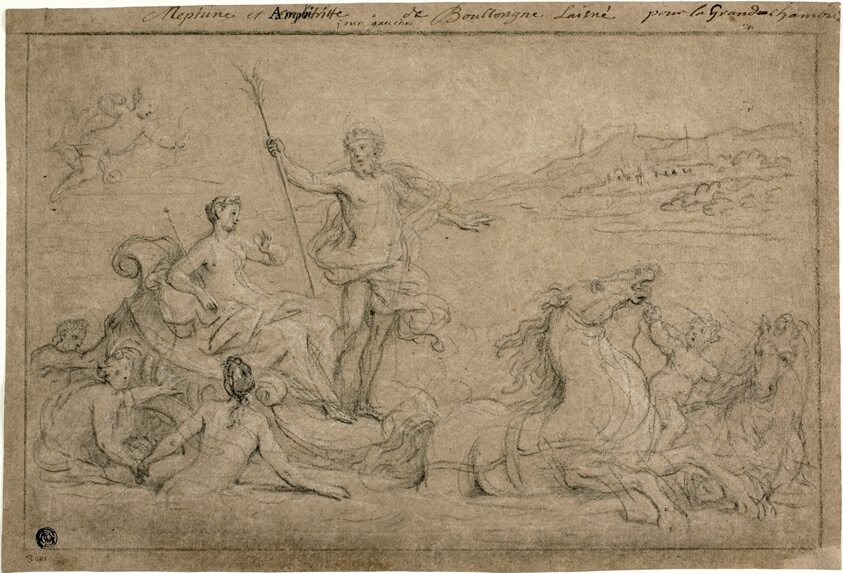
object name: Drawing and Watercolor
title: Triumph of Neptune and Amphitrite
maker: Louis Boullogne, the younger; French, 1654-1733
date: 1706–07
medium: Black chalk, heightened with white chalk, on gray-brown paper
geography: France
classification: chalk; drawings (visual works); prints and drawing